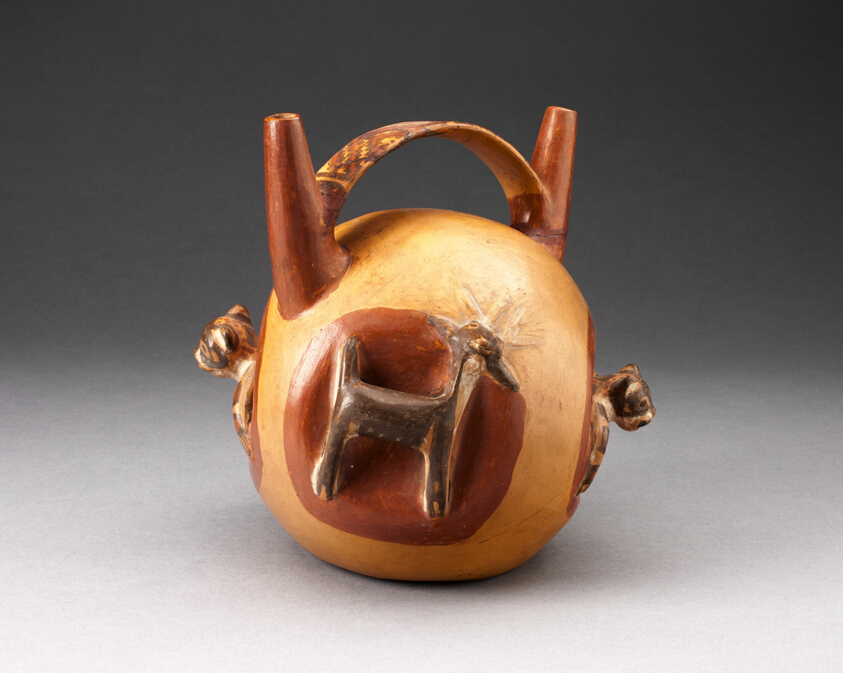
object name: Vessel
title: Double Spout Bridge Vessel with Molded Animals Emerging from Sides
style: nieveria, Arts of the Americas, andes, south american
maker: Nievería; Central coast, Peru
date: 500–800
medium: Ceramic and pigment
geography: Nievería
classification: earthenware; art of the americas; ceramics; vessel